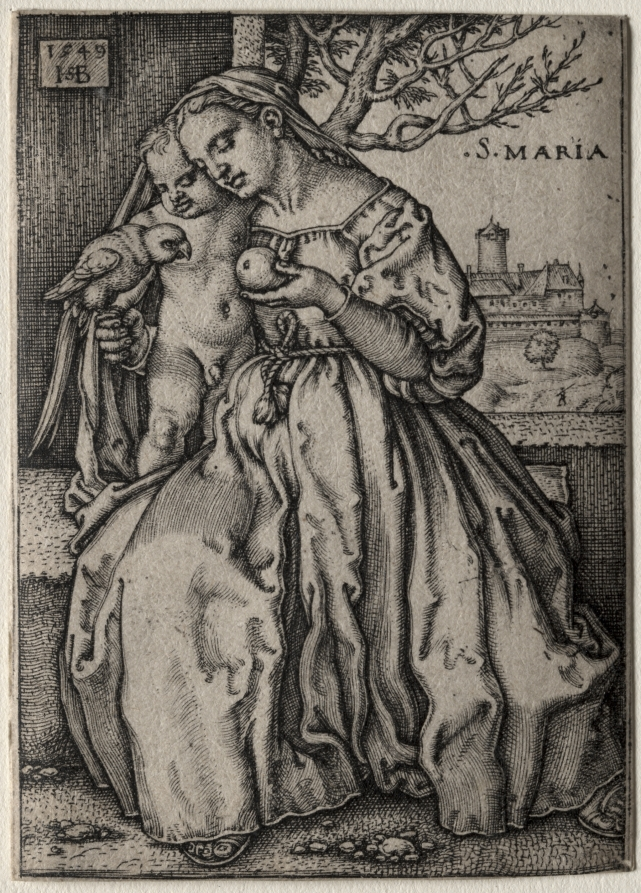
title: Virgin with the Parrot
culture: Germany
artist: Hans Sebald Beham (German, 1500–1550)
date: 1549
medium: engraving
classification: Print